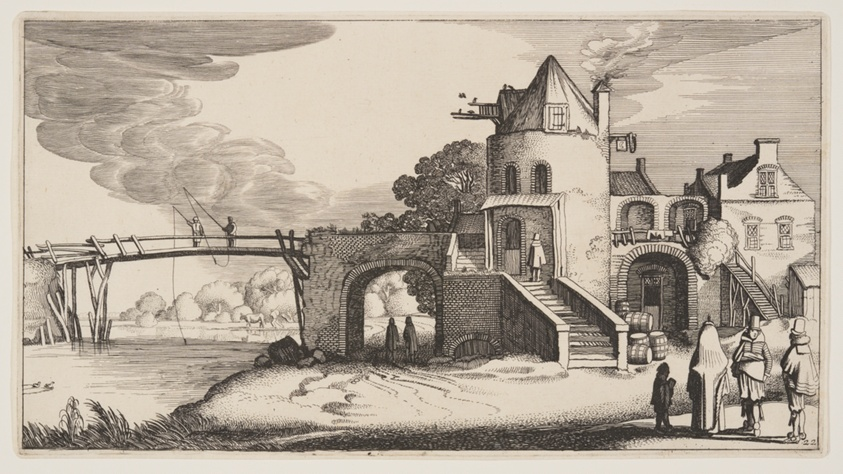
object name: Print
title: Bridge with a Toll-House, from Landscapes (Playsante Lantschappen)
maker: Attributed to Claes Jansz. Visscher II (Dutch, 1586-1652); after Jan van de Velde II (Dutch, c. 1593-1641)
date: c. 1641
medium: Etching, with engraving, on ivory laid paper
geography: Netherlands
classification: etching; paper; print; prints and drawing